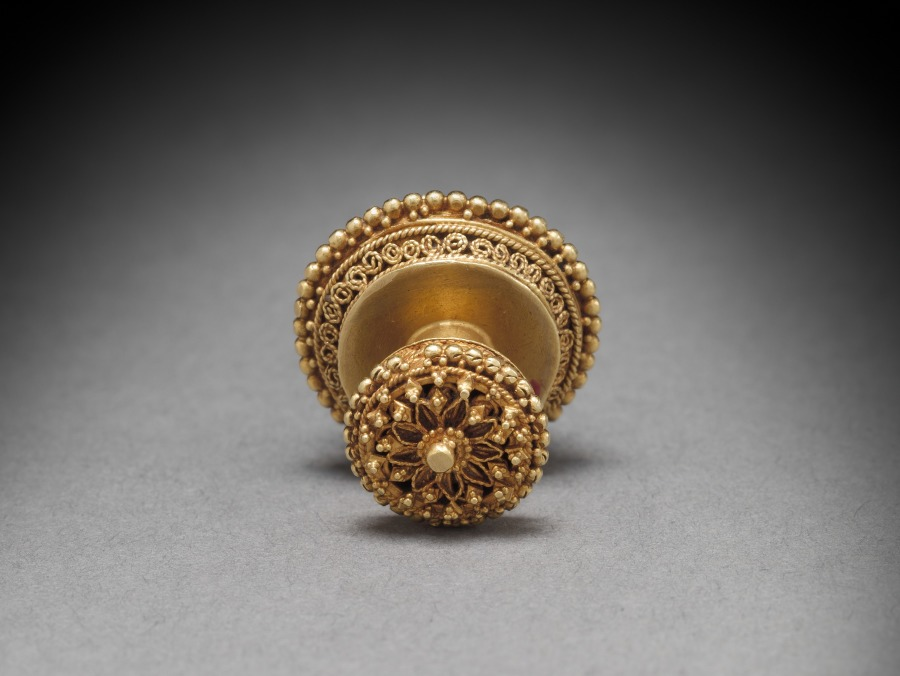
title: Ear Stud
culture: Burma (?)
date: 1800s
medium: gold and rubies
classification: Jewelry